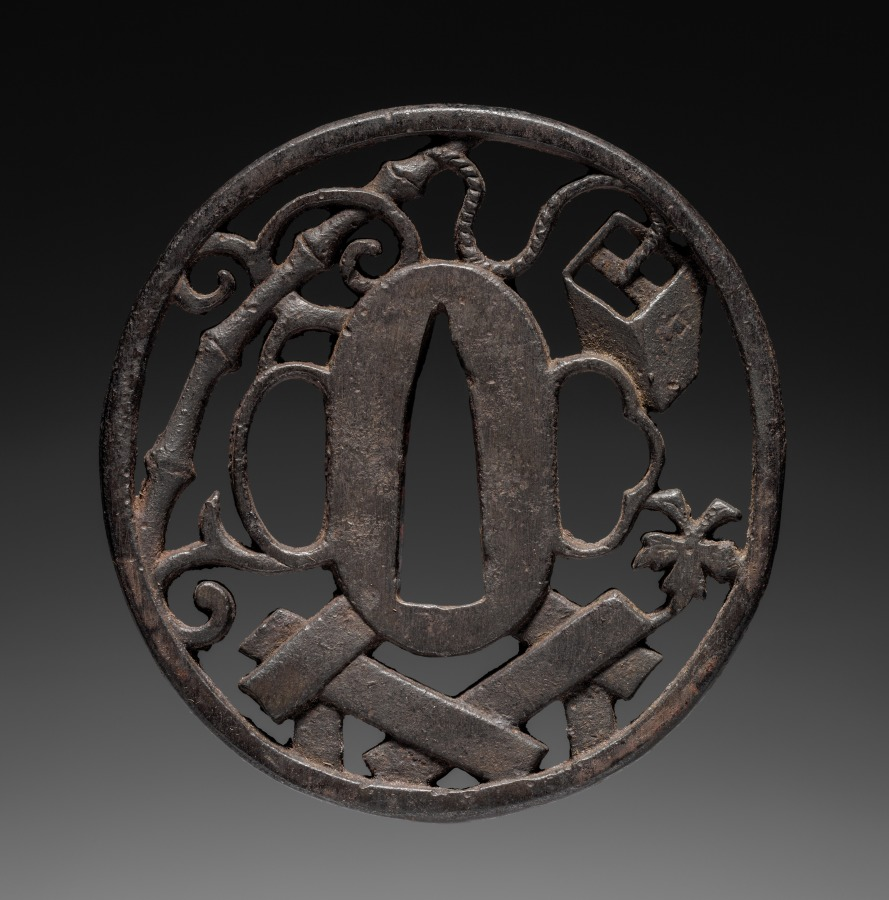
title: Sword Guard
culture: Japan, Edo period (1615–1868)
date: 1615–1868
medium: iron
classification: Arms and Armor